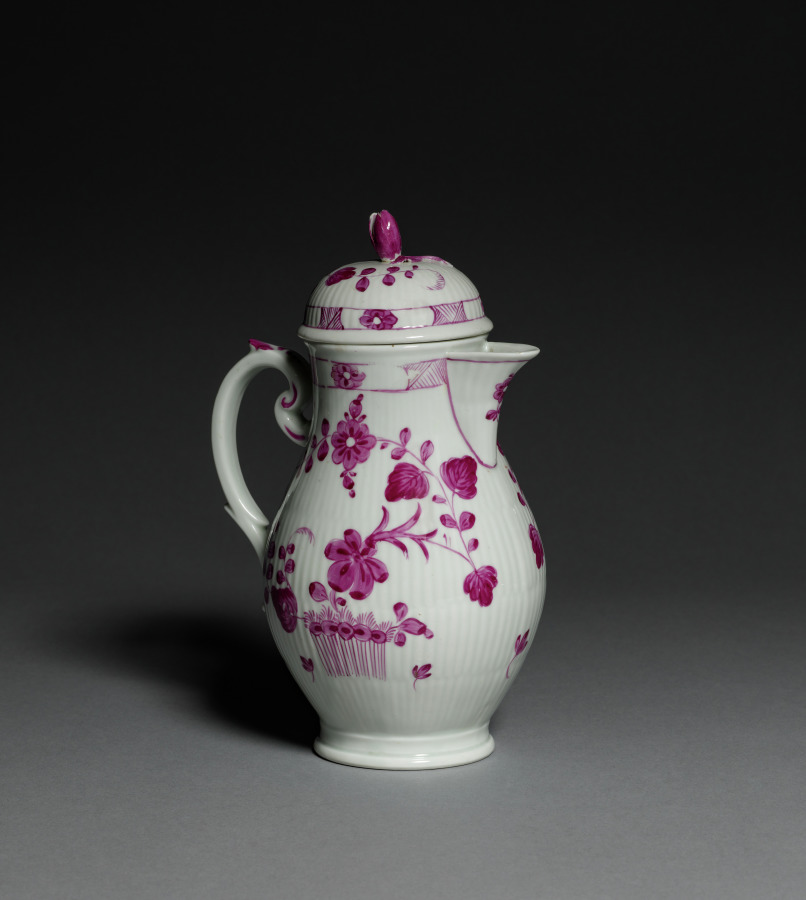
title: Chocolate Pot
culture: Germany, Berlin, late 18th century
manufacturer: Royal Porcelain Manufactory, Berlin (German)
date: late 1700s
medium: porcelain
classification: Ceramic